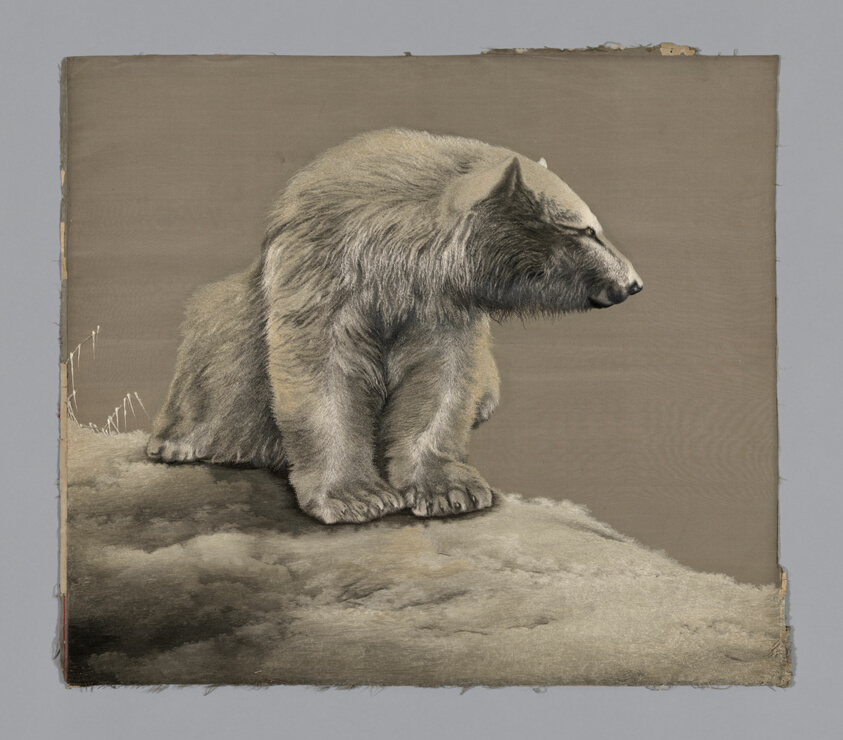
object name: Textile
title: Embroidered Picture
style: Japanism, late edo, meiji, asian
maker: Japan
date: c.1900-1910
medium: Silk; embroidered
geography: Japan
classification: textile; needlework (visual works)